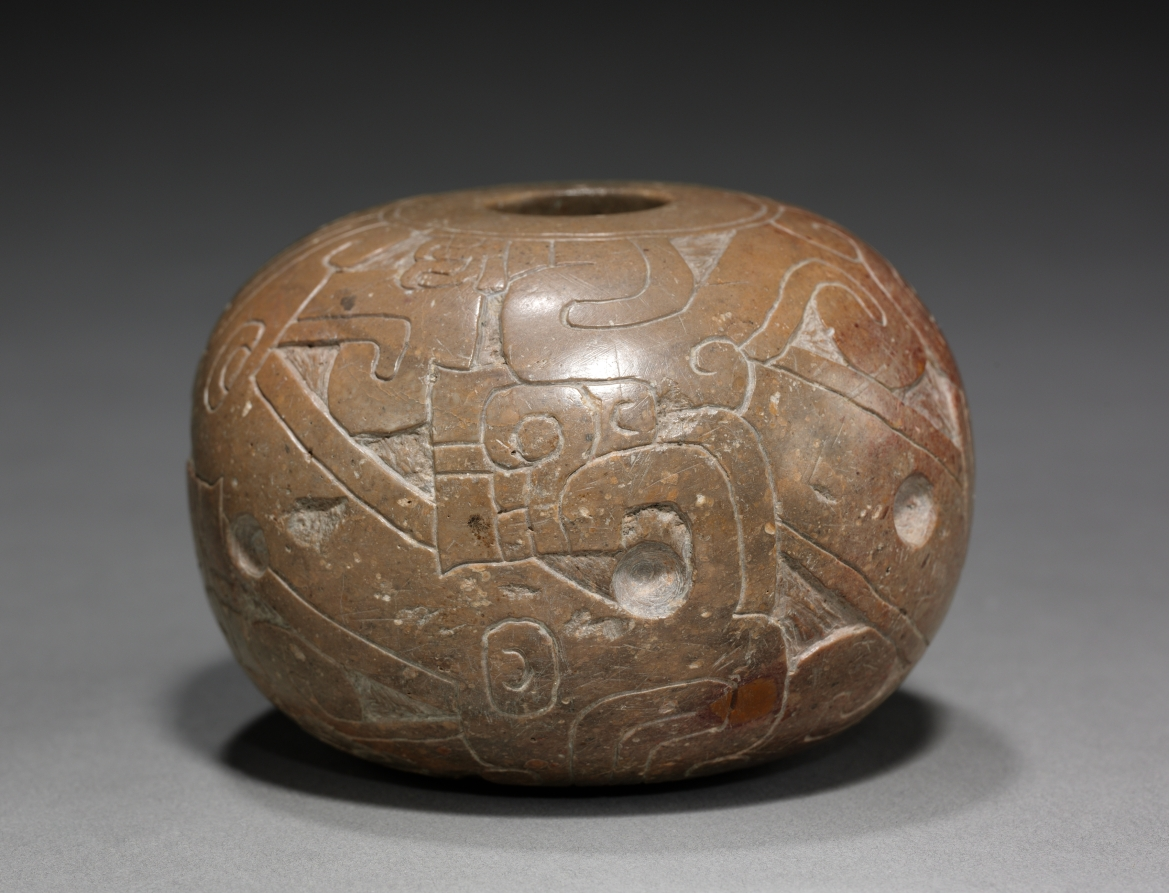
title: Container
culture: Peru, North Coast, Cupisnique style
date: 1200–200 BCE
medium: steatite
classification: Stone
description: While Chavín held sway in the highlands, coastal artists produced many objects in non-Chavín styles. Such is the case with these small, finely-carved, stone containers, which were part of north coast ritual paraphernalia, though their specific use in unclear. Both bear complex designs based on fanged heads in profile that lack lower jaws.